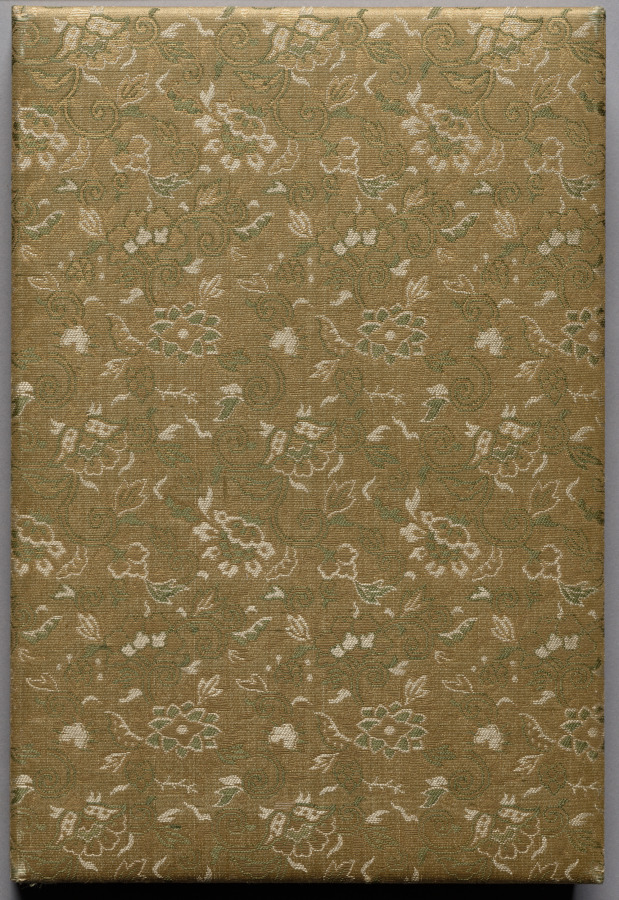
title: Flowers and Grasses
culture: Japan, Edo period (1615–1868)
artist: Tsubaki Chinzan (Japanese, 1801–1854)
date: 1841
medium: folding-album with six leaves of paintings; preface in ink on paper; paintings in ink and color on silk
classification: Bound Volume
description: This album contains six small paintings, each of which takes a different plant as its subject. The paintings include depictions of pomegranates, as well as flowering narcissus and orchid.